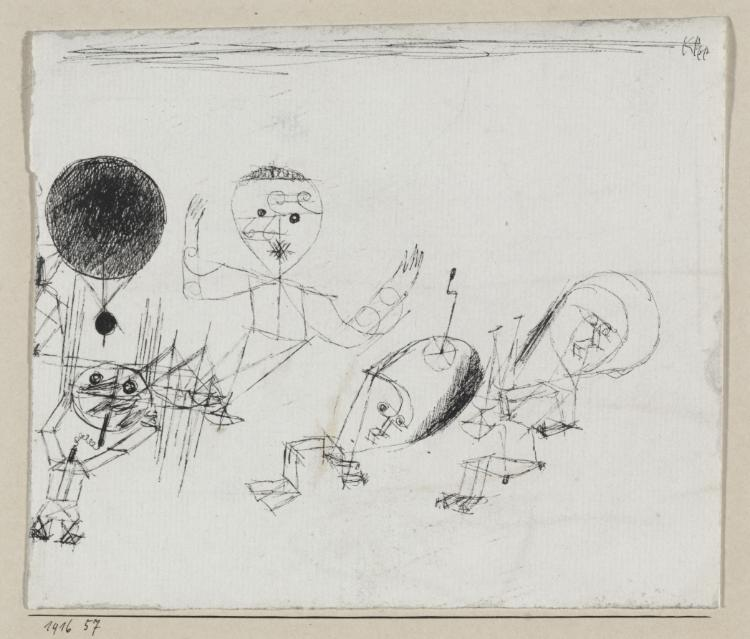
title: With the Dot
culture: Germany, 20th century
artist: Paul Klee (German, 1879–1940)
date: 1916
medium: pen and black ink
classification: Drawing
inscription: signed, upper right, in black ink: Klee ; TERTIARY SUPPORT, by artist, center left, in black ink: 1916 57 ; VERSO OF TERTIARY SUPPORT, lower left, in red ink: 7983-B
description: Paul Klee made this drawing during World War I. It shows a hovering figure, who could be saintly or demonic, overlooking a scene that includes a zeppelin, a decapitated child, a fallen soldier, and a recoiling (or attacking) figure. The soldier’s helmet displays a handle, implying the mechanized or dehumanized war machine. Klee’s title for the drawing includes the depiction of a point (•), which refers to the circular zeppelin or circle that frequently appeared in his drawings as a menacing omen. In 1915 Klee wrote: “The more horrifying this world becomes the more art becomes abstract; while a world at peace produces realistic art.”